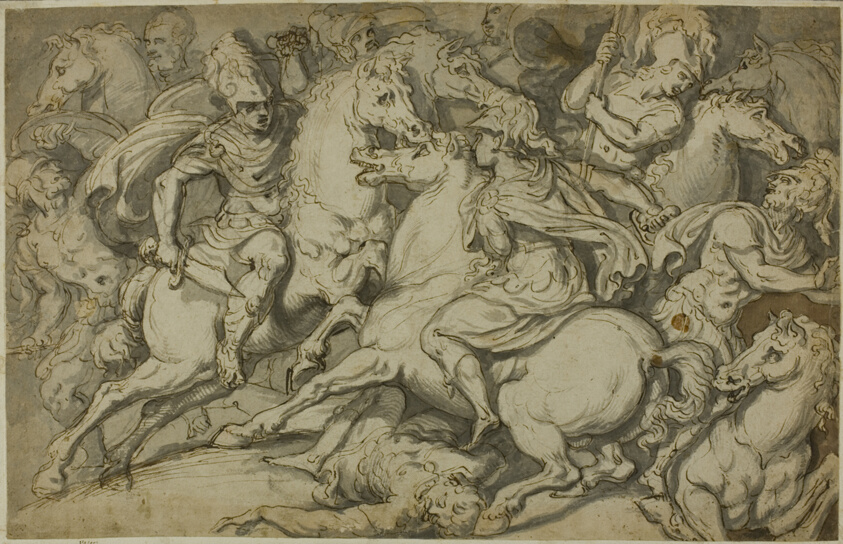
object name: Drawing and Watercolor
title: Cavalry Skirmish (recto); Kneeling Ecorché (verso)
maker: Francesco de'Rossi, called Salviati; Italian, 1510-1563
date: 1530/39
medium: Pen and brown ink with brush and gray wash, over black chalk, with later additions of brown wash in lower right, on ivory laid paper, edge mounted to cream laid paper, hinged on ivory wove card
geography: Italy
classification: ink with wash; drawings (visual works); prints and drawing